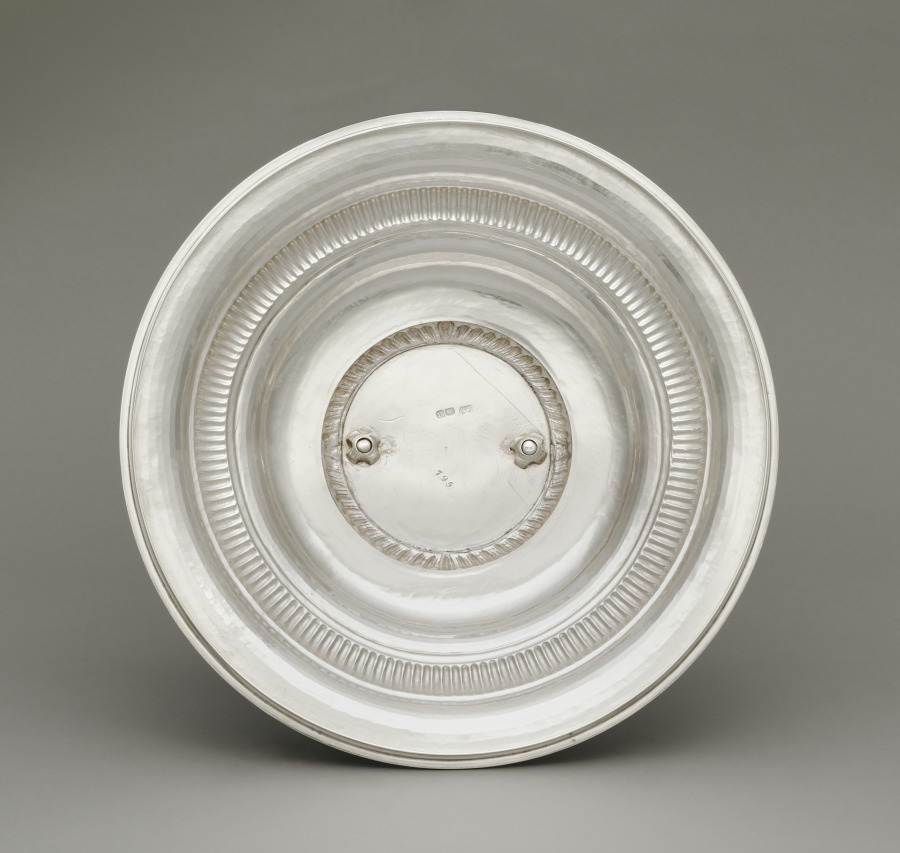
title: Cover for a Tureen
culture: England, London, 19th century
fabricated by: Paul Storr (British, 1771–1844)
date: 1812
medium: silver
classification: Silver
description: Silver fulfilled a prominent role in projecting wealth, status, power, and ritual in British life during the 1600s and 1700s. Elaborate forms such as this tureen cover, with its lionhead finials, acanthus leaves, and fluted detailing, not only represented wealth in its sheer silver weight but also provided royal and aristocratic owners a surface for displaying engraved coats of arms. The arms of the High Sheriff of Yorkshire, Timothy Hutton and his wife Elizabeth Chaytor of Spennithorne Hall in northern England are engraved on the accompanying tureen and stand by Paul Storr, one of the most prominent London silversmiths of the period.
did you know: This is a cover for a tureen. See cover record.